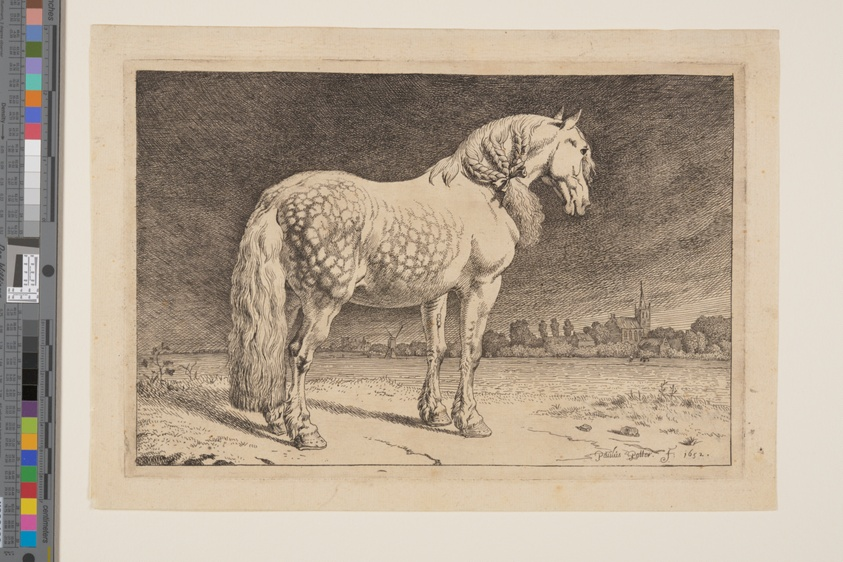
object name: Print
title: The Frisian Horse, from Series of Horses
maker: Paulus Potter (Dutch, 1625–1654)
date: 1652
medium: Etching on ivory laid paper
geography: Netherlands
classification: print; paper; prints and drawing; etching